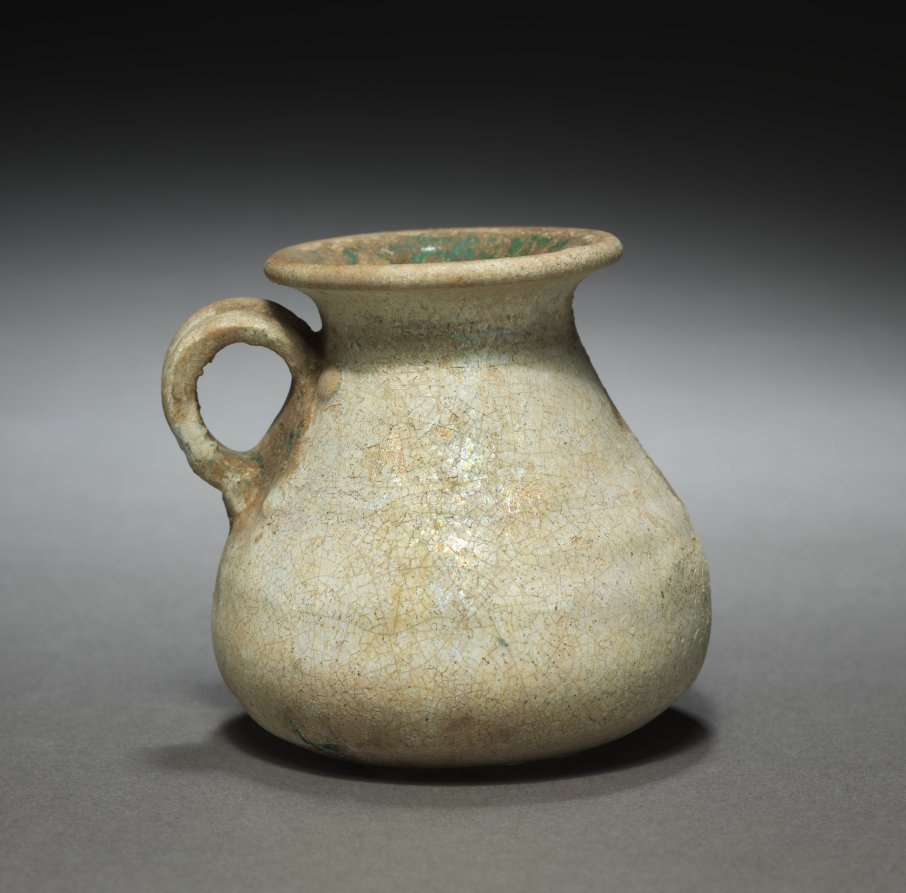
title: Small Pitcher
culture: Parthian Empire (247 BCE–224 CE)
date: 1–200 CE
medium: terracotta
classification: Ceramic